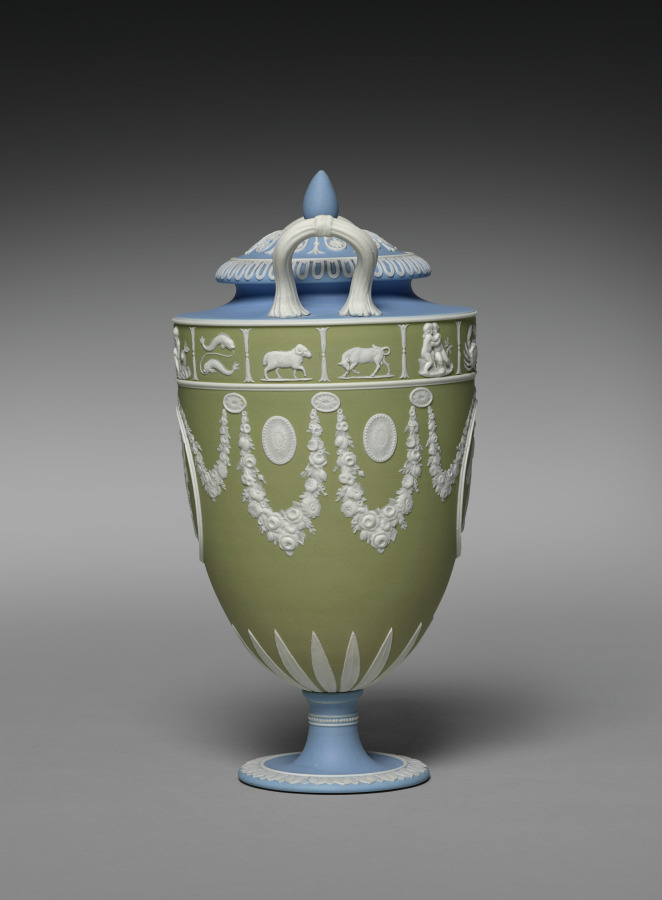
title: Covered Vase (one of a pair)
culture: England, Staffordshire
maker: Josiah Wedgwood and Sons (British, Staffordshire, est. 1759)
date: c. 1850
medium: jasper ware with relief decoration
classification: Ceramic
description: Wedgwood's tricolor jasperware first became popular in the 1770s during a period of fascination with neoclassical decoration. This vase was probably made around 1850 during the period when this type of decoration was revived. The relief medallions depict two versions of the Greek god Apollo, the god of music, next to his harp or lyre.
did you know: Signs of the zodiac form a decorative border around the upper portion of this vase.